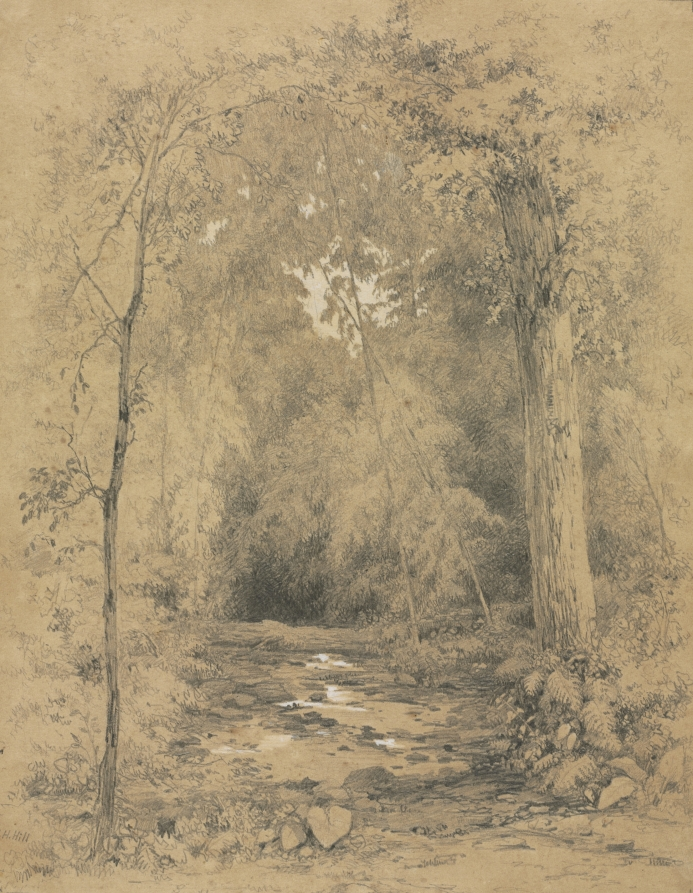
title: Forest Interior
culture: America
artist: John Henry Hill (American, 1839–1922)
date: c. 1870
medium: graphite with white heightened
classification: Drawing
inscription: signed, lower left, in graphite: J. H. Hill